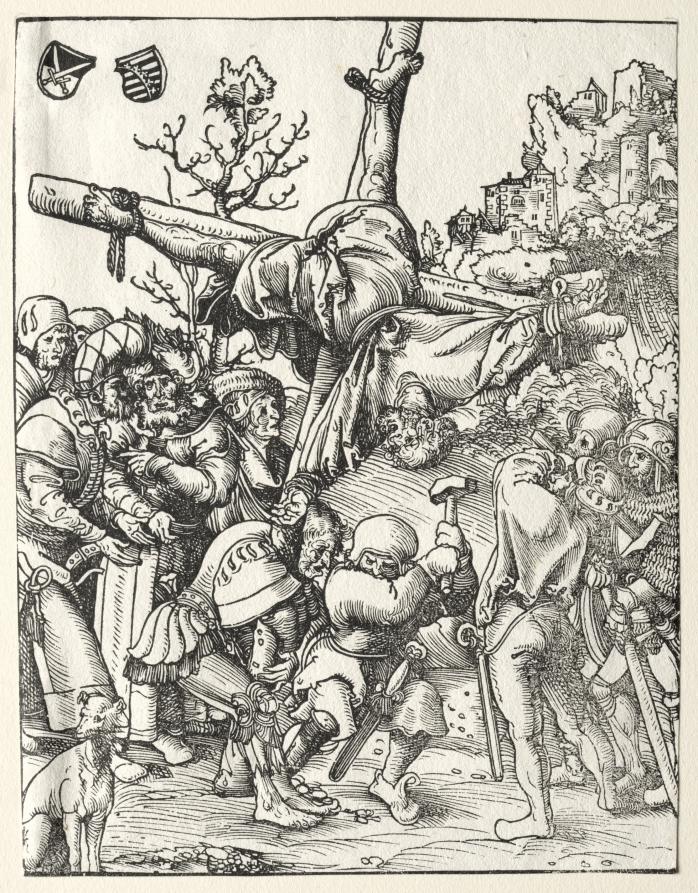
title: Martyrdom of St. Peter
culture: Germany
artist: Lucas Cranach (German, 1472–1553)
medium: woodcut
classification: Print